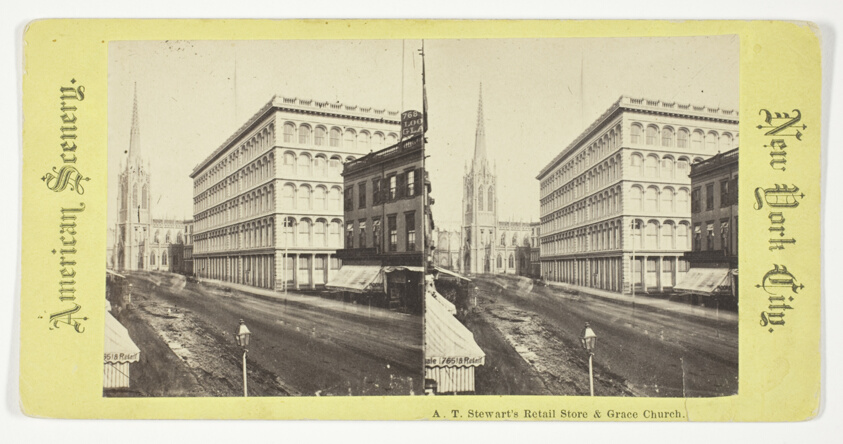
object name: Photograph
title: A.T. Stewart's Retail Store & Grace Church, New York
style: 19th century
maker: Artist unknown; American, late 19th century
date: 1875/99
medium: Albumen print, stereo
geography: New York City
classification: photography; photograph